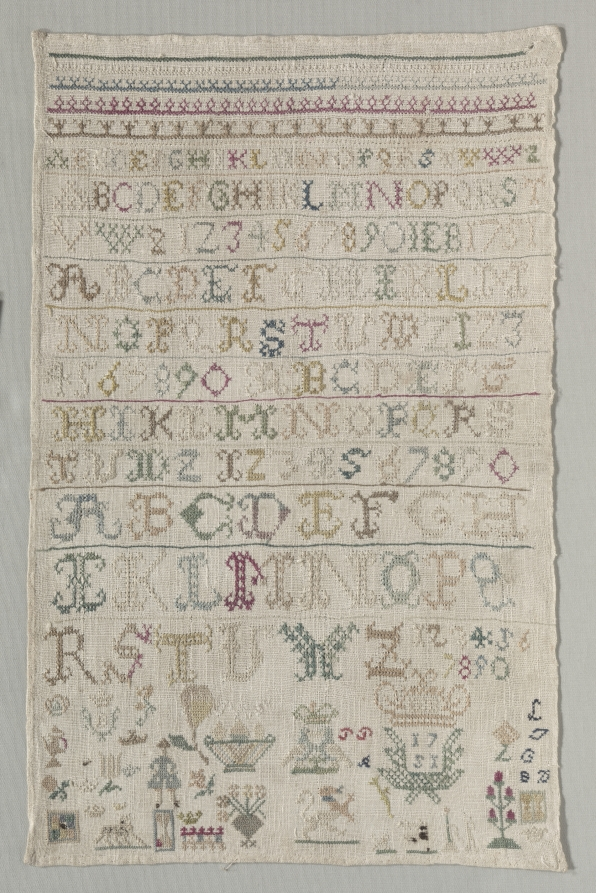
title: Sampler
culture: America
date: 1751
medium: embroidery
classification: Sampler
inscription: alphabet and numbers to ten repeated several times in horizontal row; date "1751" appears twice as well as miscellaneous letters which might be the initials of the maker.